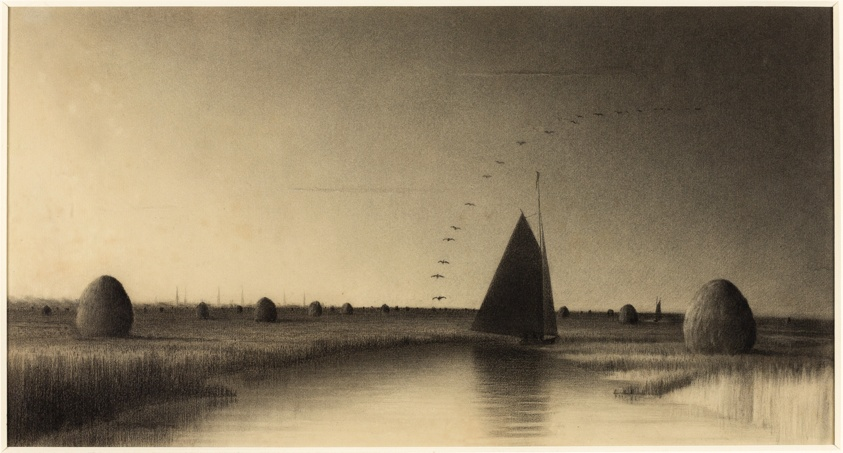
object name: Drawing and Watercolor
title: Sailboat and Haystacks on Newbury Marsh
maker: American School; late 19th century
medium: Black chalk on wove paper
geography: United States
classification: drawings (visual works); prints and drawing